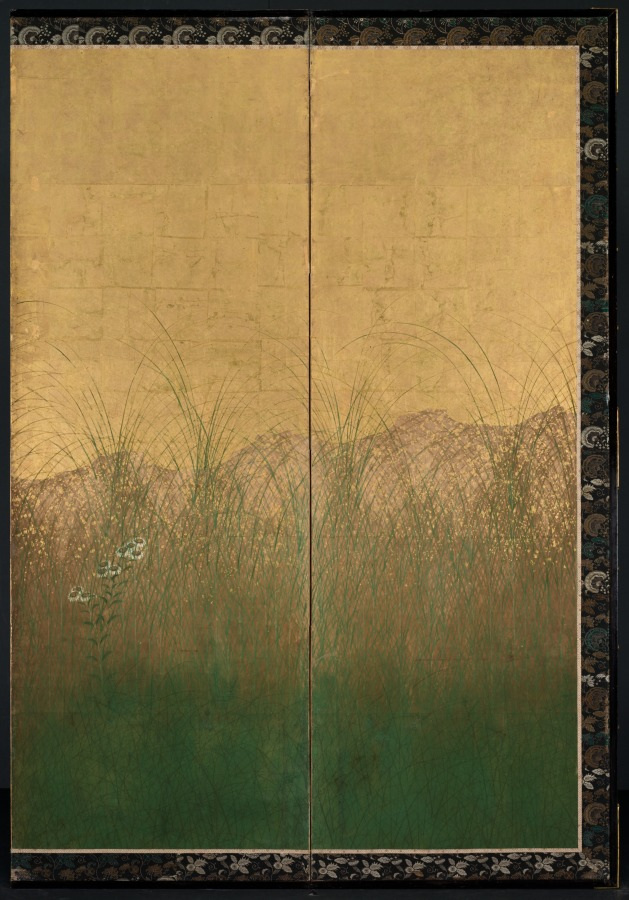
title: Autumn Evening with Full Moon on Musashino Plain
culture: Japan, Edo period (1615–1868)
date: early 1600s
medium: One of a pair of six-fold screens; ink, color, and gold and silver foil on gilded paper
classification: Painting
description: Tall grasses and autumn flowers reach out of thick green undergrowth in this depiction of the plain of Musashi, a site famous from classical Japanese poetry. A silver disc, now tarnished, represents the full moon. Flecks of cut-gold foil in the sky evoke the day’s passage into night. Once a wilderness with a vast horizon, Musashi is now densely populated.